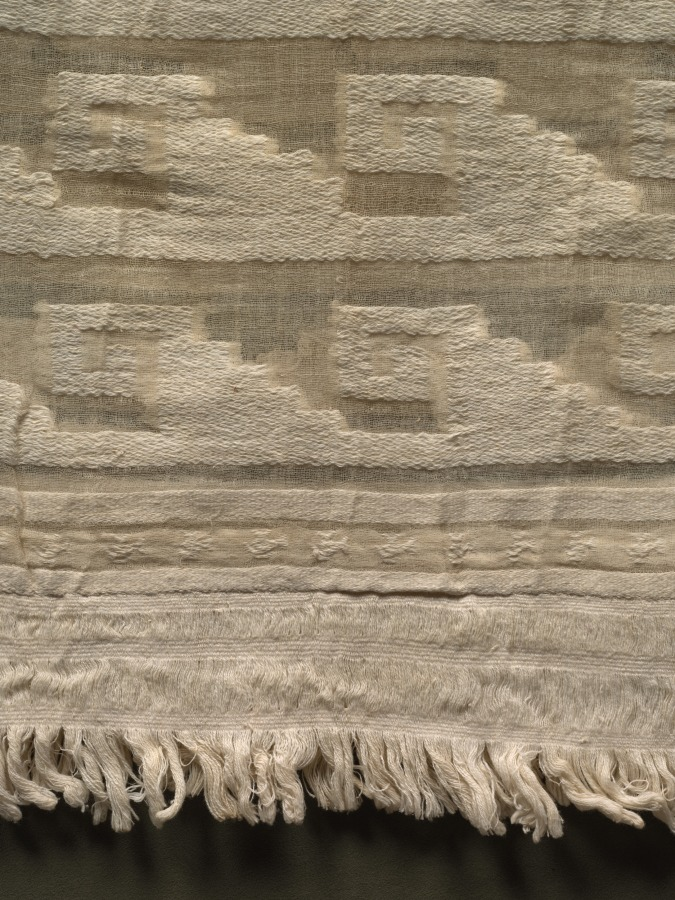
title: Tunic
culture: Peru, Chimú or Chimú-Inka, 12th-16th century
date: 1100–1532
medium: white cotton; plain weave with supplementary weft brocading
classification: Textile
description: This garment embodies an important principle of the Chimú textile aesthetic: a love of combining different textures, some dense and sculptural and others so open and airy they are nearly invisible. (The hand-spun yarns are only .1 to .2 millimeters in diameter.) It also elegantly articulates the simplified, spare visual vocabulary that the Chimú favored, here geometric motifs.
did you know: The Chimú forged an empire that thrived until the 1460s, when the Inka incorporated it into their own imperial domain.